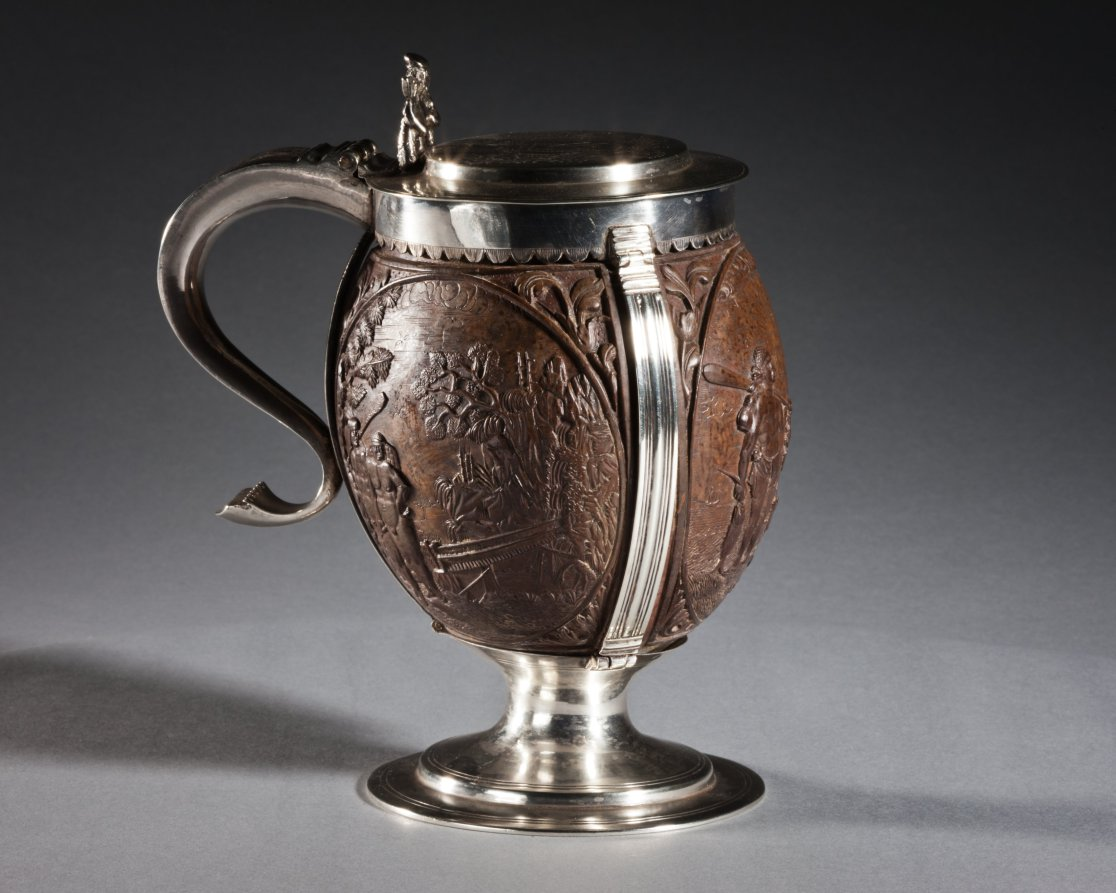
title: Coconut Cup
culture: carved coconut, probably The Netherlands; silver mount, probably England, 17th century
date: c. 1630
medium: carved coconut in silver mount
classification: Metalwork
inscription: top lid has engraved coat-of-arms, underside of lid has inscription: George Lewis TIVERTON Feby, 1st 1760.